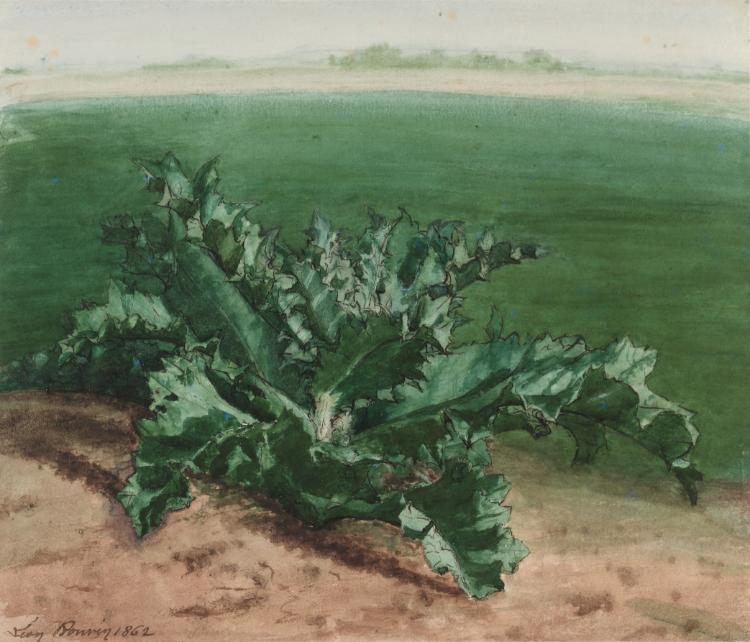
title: Study of a Plant, Possibly Thistle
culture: France, 19th century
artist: Léon Bonvin (French, 1834–1866)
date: 1862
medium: Watercolor and pen and brown ink with white heightening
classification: Drawing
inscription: signed, lower left, in brown ink: Léon Bonvin 1862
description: Neglected within his own time, the watercolors of Bonvin have only come to be fully appreciated in the late 20th century. An artist with little formal training, Bonvin earned a living working in his family’s inn in Vaugirard, on the outskirts of Paris. The landscape near his home and studies of the inn’s garden became his themes.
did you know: This watercolor was made after the year of Léon Bonvin's marriage, a time when he was increasingly trying to make a living from his art.